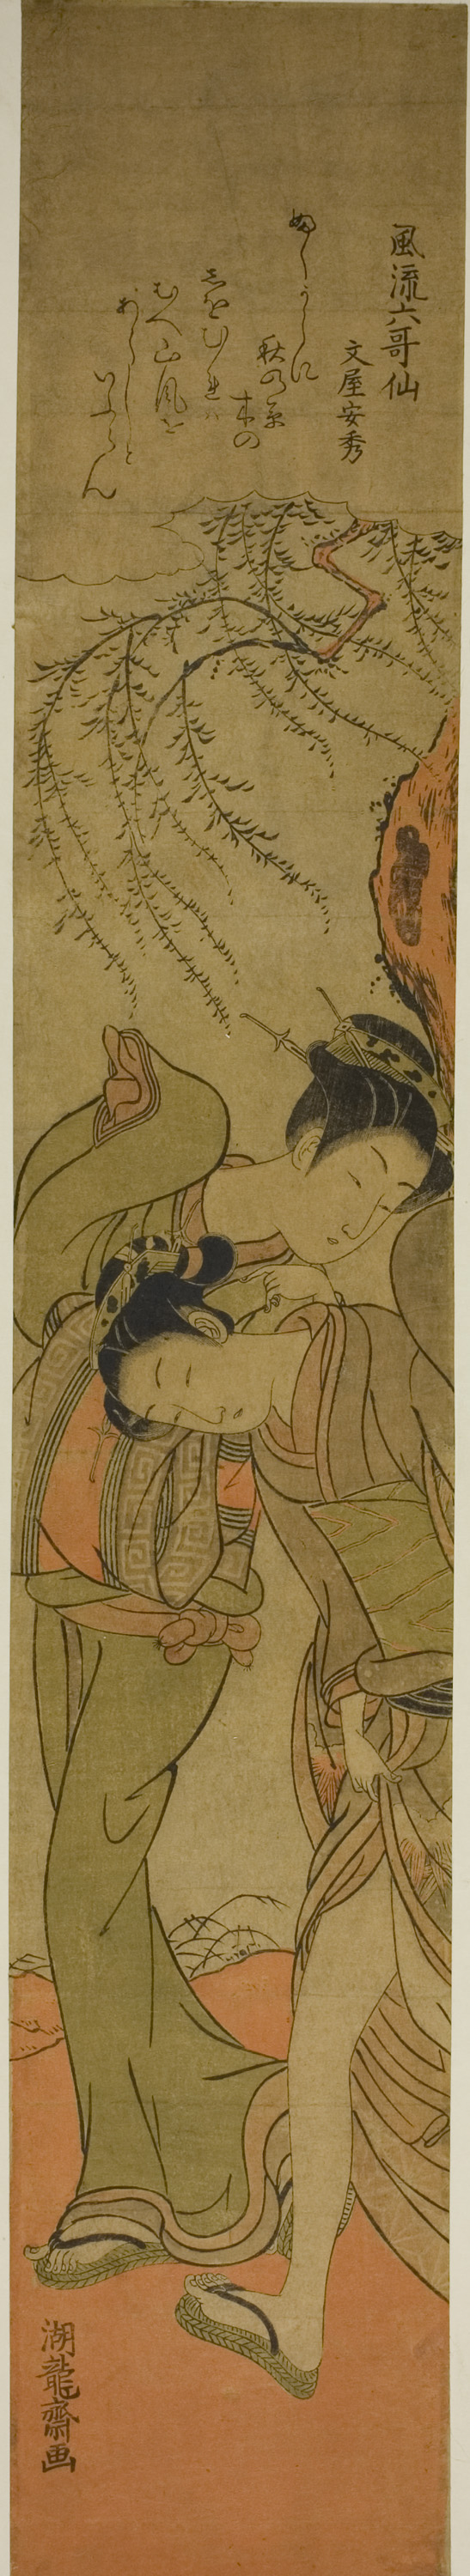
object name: Print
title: Poem by Bun'ya no Yasuhide, from the series "Fashionable Six Immortal Poets (Furyu rokkasen)"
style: Japanese (culture or style)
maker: Isoda Koryusai (Japanese, 1735-1790)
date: c. 1773/75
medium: Color woodblock print; hashira-e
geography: Japan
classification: woodblock print; print; asian art